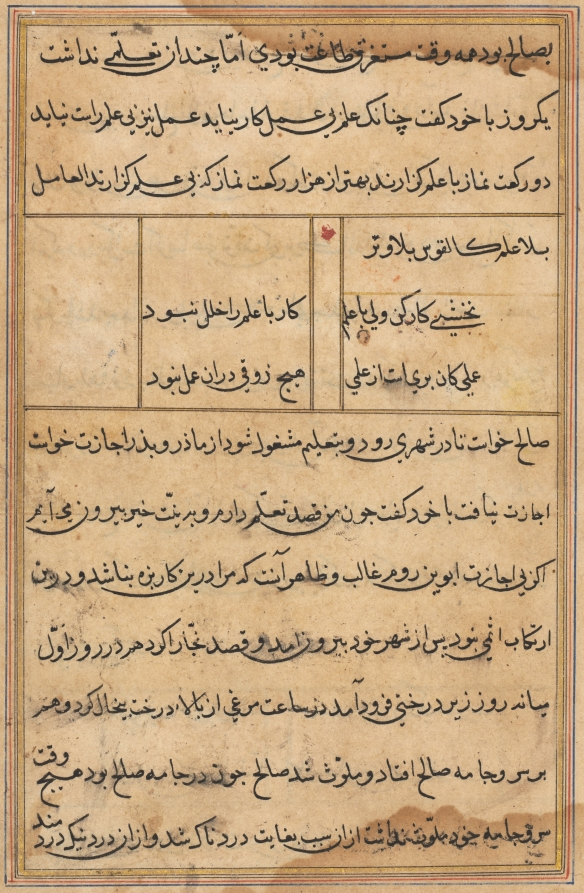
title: Page from Tales of a Parrot (Tuti-nama): text page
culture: Mughal India, court of Akbar (reigned 1556–1605)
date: c. 1560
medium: gum tempera, ink, and gold on paper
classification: Painting